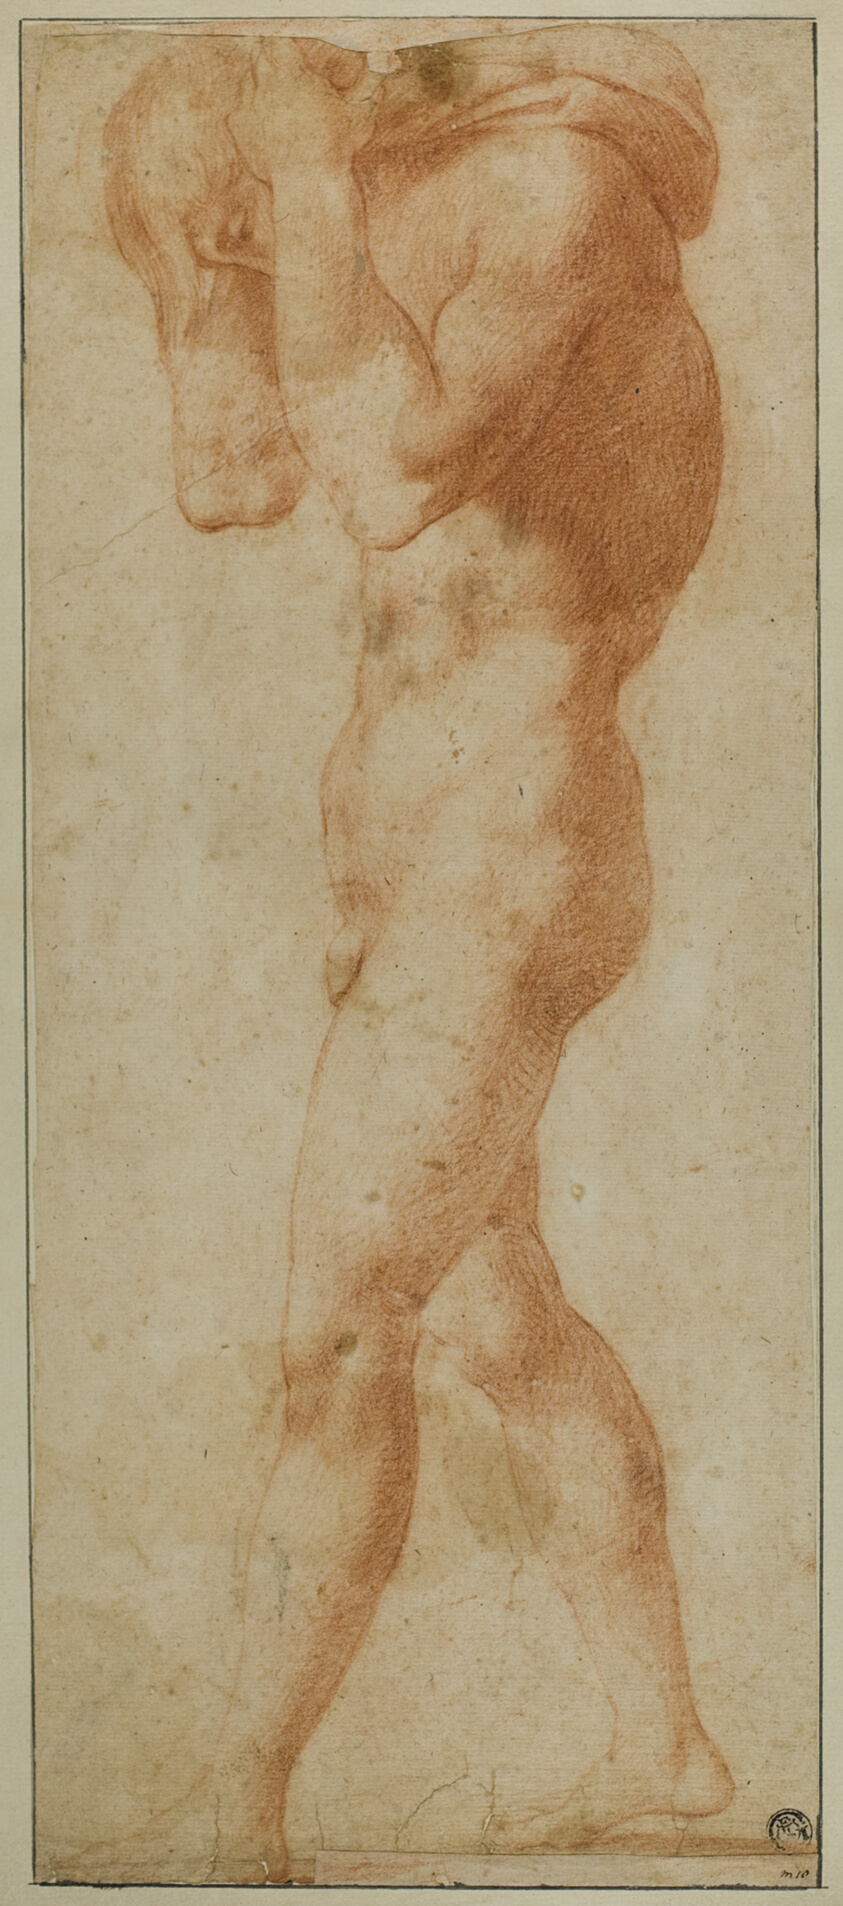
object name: Drawing and Watercolor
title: Male Nude Walking to Left, Carrying Burden on His Shoulders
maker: Possibly after Rosso Fiorentino; Italian, 1494-1540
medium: Red chalk on buff laid paper, laid down on gray laid card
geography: Italy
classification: chalk; drawings (visual works); prints and drawing